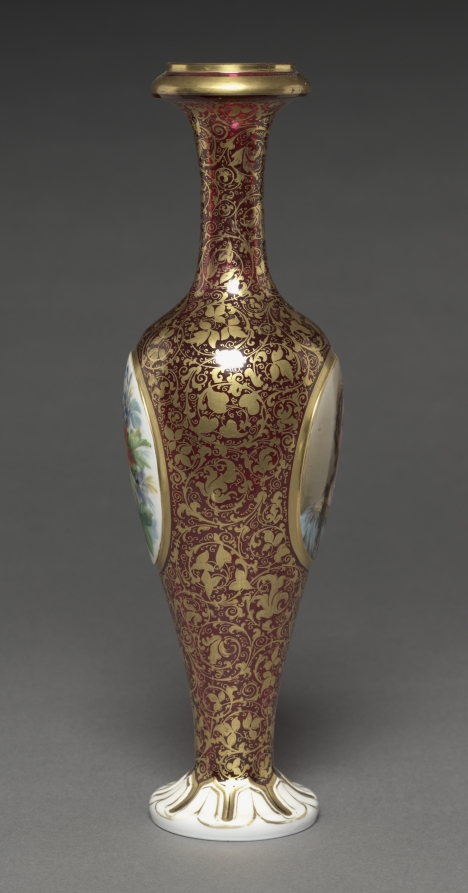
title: Vase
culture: Bohemia (?), 19th century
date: 1840–1860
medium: glass with enamel and gilt decoration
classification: Glass